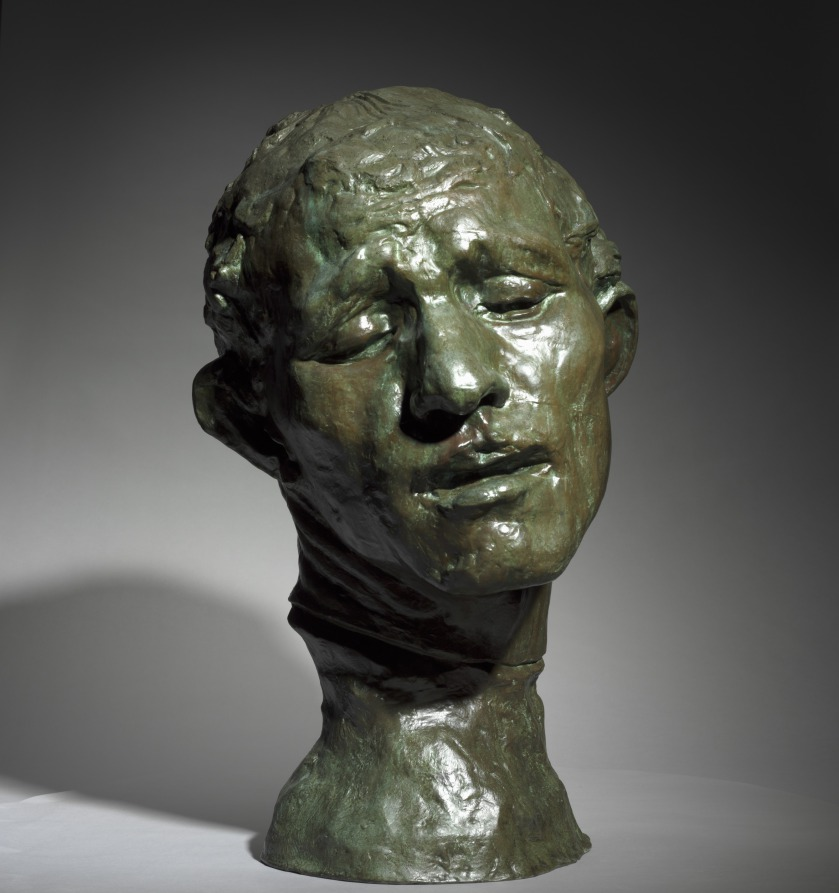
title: Heroic Head of Pierre de Wissant, One of the Burghers of Calais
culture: France, 19th century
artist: Auguste Rodin (French, 1840–1917)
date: 1886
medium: bronze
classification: Sculpture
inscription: inscribed at neck, left: A.Rodin; inscribed lower back: Alexis Rudier/Fondeur-Paris.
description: This sculpture depicts one of the figures in Rodin’s large public monument The Burghers of Calais (1884–89), featuring six French men who volunteered to be taken prisoner by the English in exchange for lifting the siege of Calais during the Hundred Years War (1337–1453). Pierre de Wissant’s anguished expression suggests extreme mental suffering as he contemplates his expected execution. Rodin exhibited a life-size version of the figure as an independent work before completing the monument. He later made multiple versions in various sizes and media.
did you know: This sculpture depicts the head of a figure from Rodin's large public monument The Burghers of Calais (1884-89). The CMA also owns a plaster version of the head.